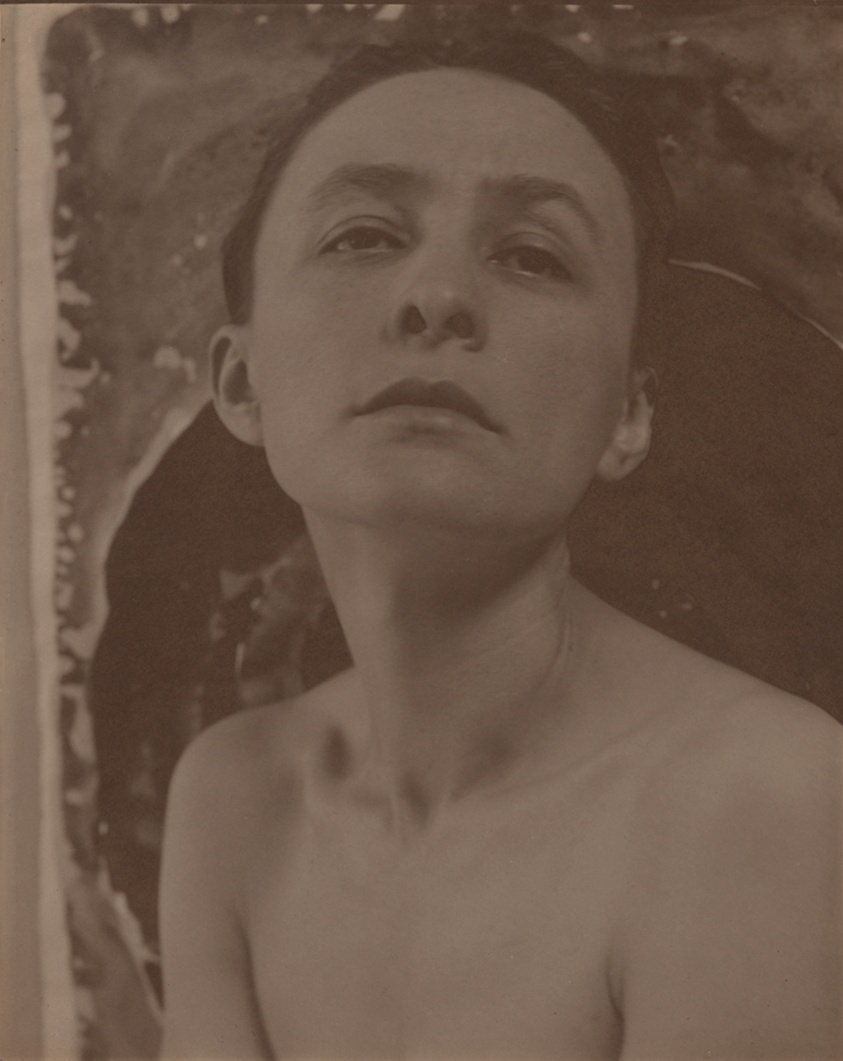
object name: Photograph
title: Georgia O'Keeffe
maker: Alfred Stieglitz (American, 1864–1946)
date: 1919/21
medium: Palladium print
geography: United States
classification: palladium print; photographic process; photography; photograph